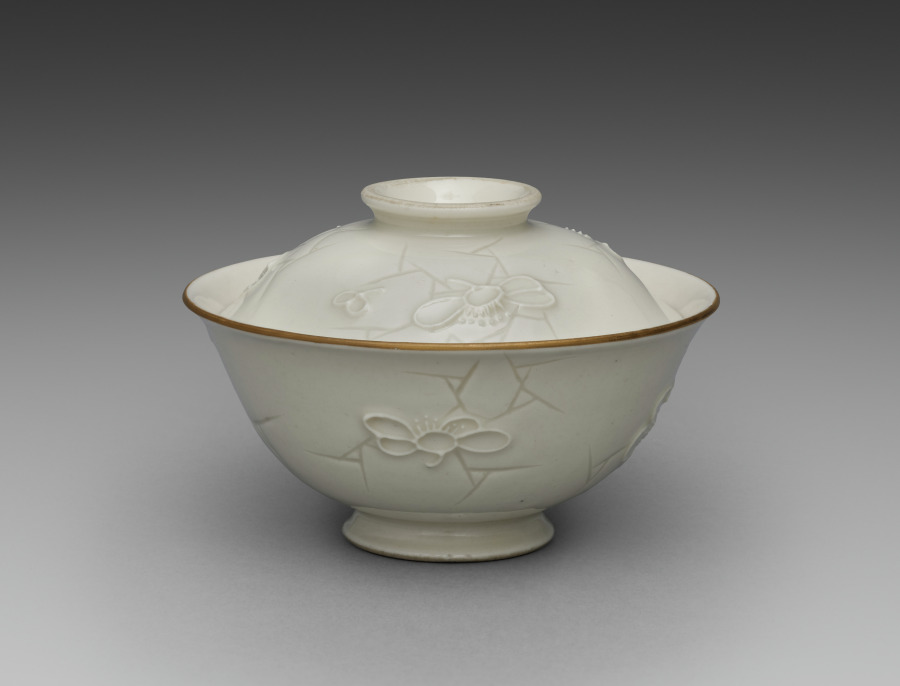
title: Covered Bowl from Dining Set with Plum Blossoms and Cracked-Ice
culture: Japan, Meiji period (1868–1912)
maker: Seifū Yohei II (Japanese, 1844–1878)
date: c. 1875–78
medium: Porcelain with molded designs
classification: Ceramic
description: Each item in this set has a delicate low-relief design of flowering plum branches over scattered, intersecting lines meant to resemble the cracked-ice surface of a frozen body of water and is signed on the base in gold pigment. While Yohei II produced many fine works in underglaze blue, like those produced by Kiyomizu Shichibei, he also made works in quite different styles later in his career, from the early 1870 s. In 1873, he was appointed purveyor to the Industrial Center of Kyoto Prefecture, a designation associated with Kyoto’s efforts to reach an international market through the port of Kobe; and from 1875 until his death, he was involved in national-level projects to present Japanese ceramics across the world. It was during this period that Yohei III was apprenticed to Yohei II, and it has been suggested that this set may in fact be an early example of Yohei III’s work, which he signed with his teacher’s name. Decorated with flowers resembling Japanese textile motifs, the set calls to mind the design of Yohei II’s pair of vases with plum blossoms in the Victoria and Albert Museum. Here, the elaborate trees created for a formal public exhibition setting have been translated into the approachable blossoms of the genteel domestic environment. While the designs are consistent across the pieces, each raised flower petal and pistil and each incised line in the ice was done by hand, so the cups, bowls, and dishes are similar yet unique. The bottoms of two boxes once identified the set’s owner, but the information has been deliberately obscured with black ink. However, inscriptions still visible appear to indicate two occasions, once at the end of July 1886 , and once again in June 1916 , when parts of the set were requested from Hokura in Niigata Prefecture. The location corresponds to a neighborhood in the present-day city of Jōetsu. The surname Tsuji 辻 also appears on a paper tag affixed to one of the box cloths. Future research may possibly reveal more about their provenance. A vase by Yohei III in a private collection combines the formal grandeur of the Yohei II vases in the Victoria and Albert Museum with the gentler design of this dining set, placing flowering plum trees against soft, scalloped-edge clouds resembling those in golden screens.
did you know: The dining wares have a creamy white coloration that the four boxes containing them identify as Korean in style.